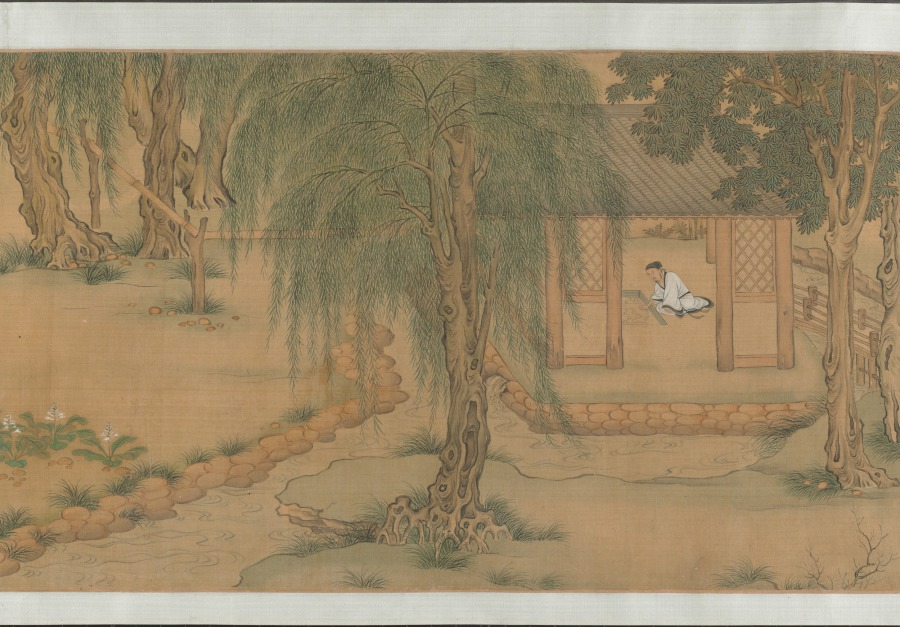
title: Garden for Solitary Enjoyment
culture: China, Ming dynasty (1368–1644)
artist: Qiu Ying (Chinese, 1494–1552)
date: 1515–52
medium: Handscroll; ink and light color on silk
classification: Painting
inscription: Accompanying text of an essay together with seven poems of Sima Guang (1019–1086) and one poem of Su Shi (1037–1101) written by Wen Zhengming (1470–1559) in 1558.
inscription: 2 colophons and 82 seals: 4 seals of Wen Zhengming 文徵明 (1470–1559); 59 seals of Xiang Yuanbian 項元汴 (1525–1590); 1 colophon, dated 1644, and 7 seals of Xiang Yukui 項禹揆 (c. late 1500s–1659); 1 colophon, dated 1880, and 2 seals of Weng Tonghe 翁同龢 (1830–1904); 2 seals of Ch'eng Chen-i (19th c.); 1 seal of Han Ch'ung (19th c.); 4 seals of Wan-go H. C. Weng 翁萬戈 (1918–2020); 3 seals unidentified.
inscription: Colophon by Xiang Yukui 項禹揆 (c. late 1500s–1659): The painting of The Garden for Self-enjoyment on the right by Shih-chou, Mr. Qiu [Qiu Ying] is in the style of Li Lung-mien. Its mood is peaceful, as if meeting the ancient gentlemen face to face among the brushes and silk; it lifts one above the sordid bustle of life. Formerly, my late father handed me this scroll which had only the painting without the written essay. I considered asking a good calligrapher to write the essay to add to it but was afraid that the quality of the writing would not match the painting. Several years later, I saw at a friend's house this essay and poems (of Ssu-ma Kuang] written by Hengshan [Wen Zhengming], once owned by my grandfather; so I spared no expense to obtain it. I rejoiced at this and said: "The divine swords are finally united. How things are pre-destined!" Now my friend Chang Kung-chao's technique for mounting [painting and calligraphy] is excellent. Therefore by daring to take them out and join them together, I can preserve this beautiful story of singular reunion. Xiang Yukui recorded at Hai-yeh-t'ang [hall] two days before New Year's Eve in the jiasheng year of the Chongzhen era [1644]. trans. LYSL/HK/WKH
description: Garden of Solitary Enjoyment refers to a site built in 1073 by the statesman Sima Guang (1019–1086) after he had retired to Luoyang, Henan province. Every spring, visitors would flock to his garden. Each of its seven structures references a historic figure. Sima wrote: I channel streams [like Du Mu], to water flowers [like Bai Juyi], or trim bamboo [like Wang Huizhi]. . . . I know of no joy between heaven and earth that could take its place. Qiu Ying’s painting, created after an 11th-century version of the same theme, must have appealed to garden owners of the Ming dynasty, since it became the template for numerous Suzhou workshop copies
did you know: Sima Guang completed his monumental survey of Chinese history, Zizhi tongjian, in the garden depicted in this painting.